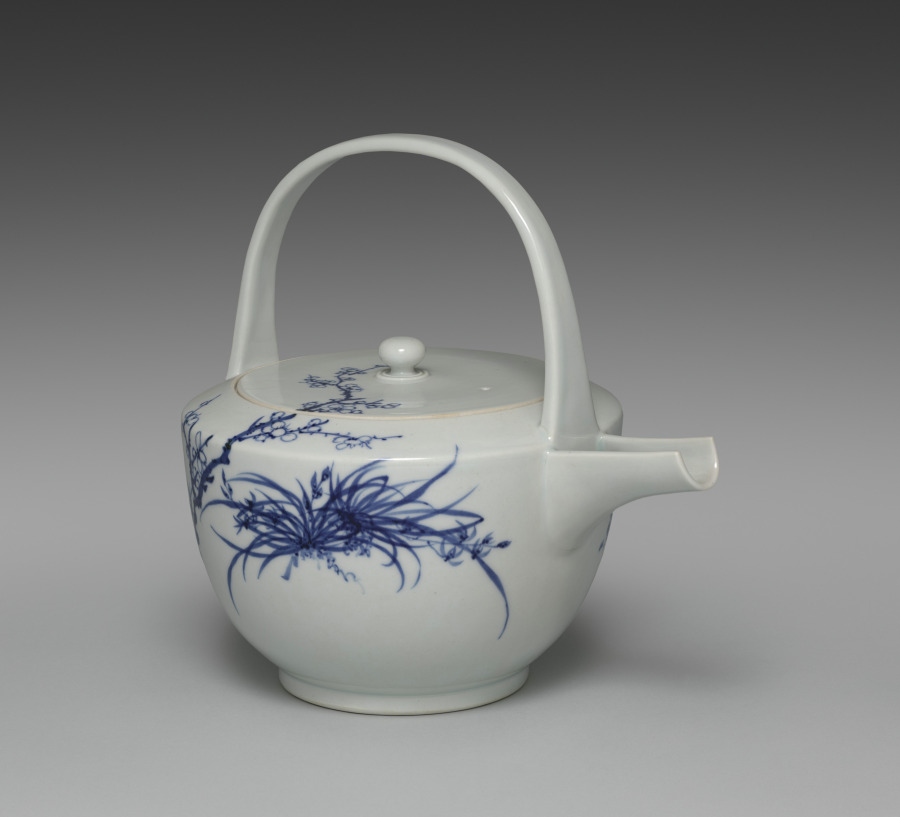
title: Sake Pourer with Chrysanthemum, Orchid, and Plum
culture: Japan, Meiji period (1868–1912)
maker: Seifū Yohei III (Japanese, 1851–1914)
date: c. 1887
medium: Porcelain with underglaze blue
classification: Ceramic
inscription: Artist's signature in underglaze blue on the base.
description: Seifū Yohei II and his successor, Seifū Yohei III, trained in ink painting. Their brush skills are seen in their underglaze cobalt blue designs. Orchid, bamboo, chrysanthemum, and plum, appearing on Yohei III’s sake pourer, are known as the Four Gentlemen. They symbolize the virtues of humility, integrity, endurance, and perseverance.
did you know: This sake pourer is decorated with the Chinese theme of the Four Nobles, in which the qualities of a good person are represented by plant.